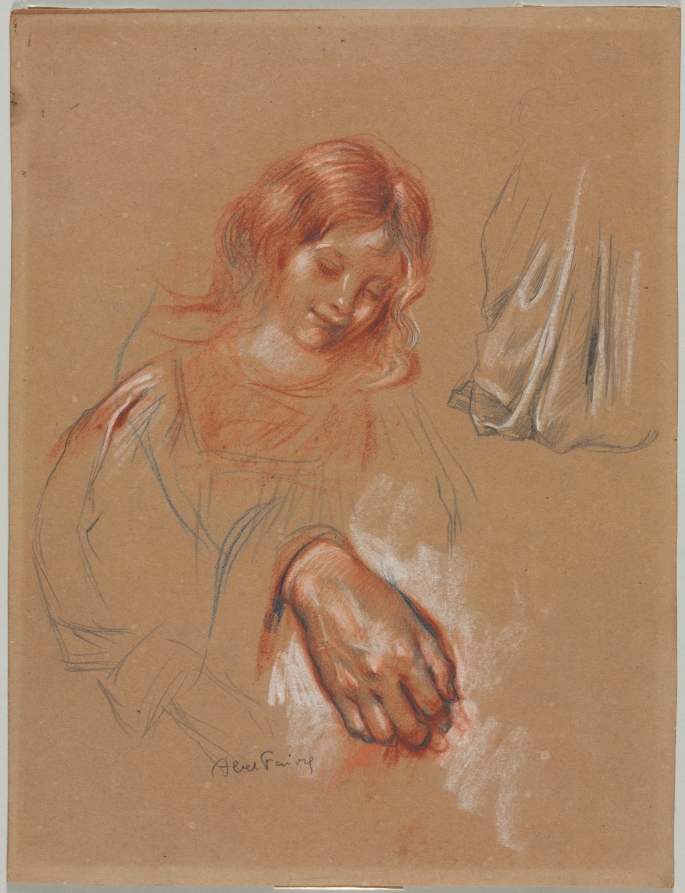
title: Study of a Child's Head and Study of a Woman's Hand and Drapery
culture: France, late 19th-early 20th century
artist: Jules Abel Faivre (French, 1867–1945)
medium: red and blue crayon, heightened with white, on tan paper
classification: Drawing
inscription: Signed in pencil lower left: Abel Faivre